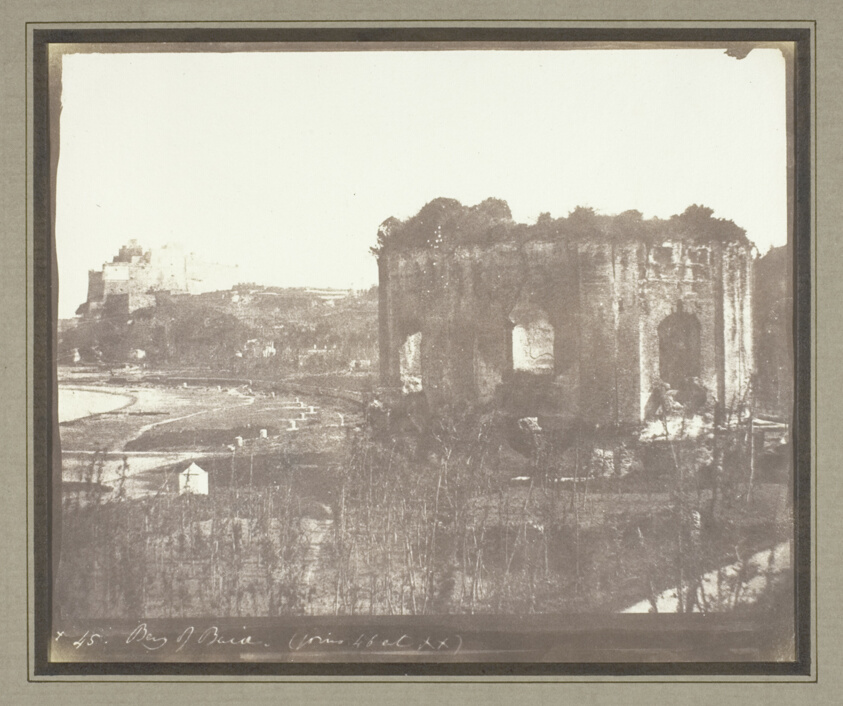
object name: Photograph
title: Bay of Baia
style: 19th century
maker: Rev. Calvert R. Jones (Welsh, 1804–1877)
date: 1846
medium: Salted paper print from a calotype negative, printed by William Henry Fox Talbot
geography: Wales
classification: salted paper print; photographic process; photography; photograph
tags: Collected by Hugh Edwards